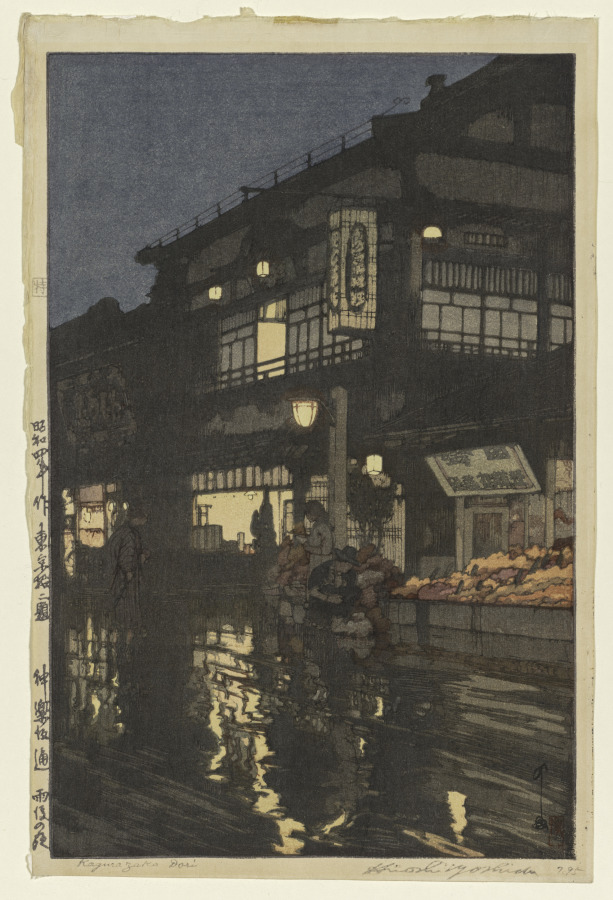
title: Kagurazaka Street after a Night Rain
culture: Japan, Shōwa period (1926–89)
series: Twelve Scenes of Tokyo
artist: Yoshida Hiroshi (Japanese, 1876–1950)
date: after 1929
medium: Woodblock print; ink and color on paper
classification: Print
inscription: Lower left, in graphite: Kagurazaka Dori; lower right corner: Hiroshi Yoshida 7.95